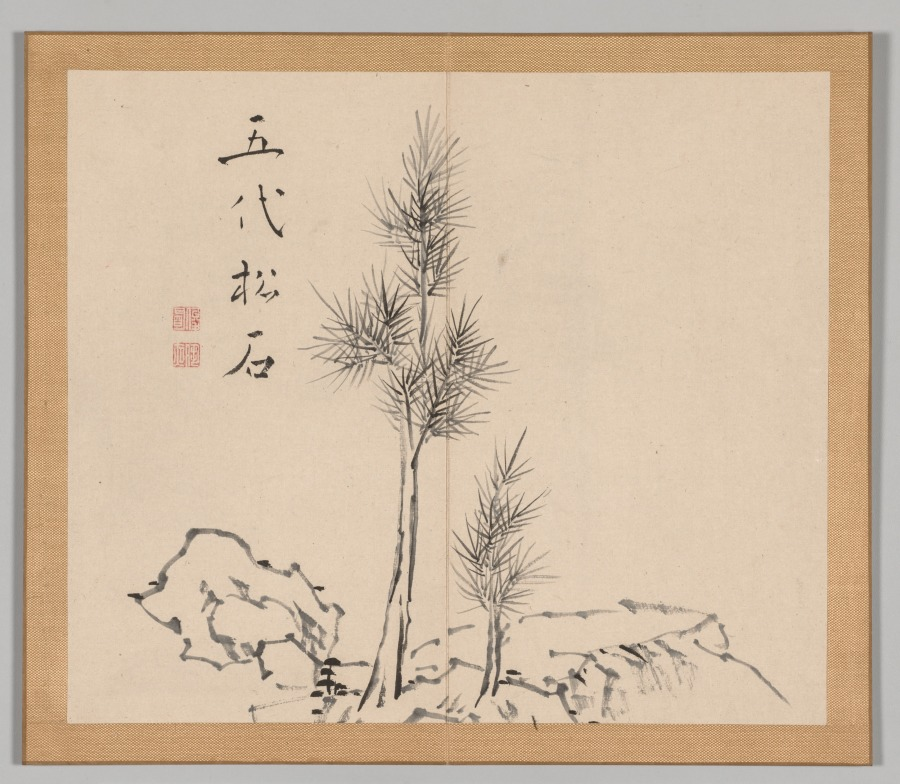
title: Reverberations of Taiga, Volume 1 (leaf 2)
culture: Japan, Edo period (1615–1868)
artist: Aoki Shukuya (Japanese, d. 1802)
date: mid- to late 1700s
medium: double-leaf from a pair of albums; ink and light color on paper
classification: Portfolio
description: Traditionally, young painters in Japan began their studies with an established master-painter. The master's compositions invariably became models that the apprentice copied to learn various ink and brush techniques. Shukuya was a pupil of the famous Kyoto artist Ikeno Taiga, whose style is reflected in these sketches of rocks, trees, and mountains.